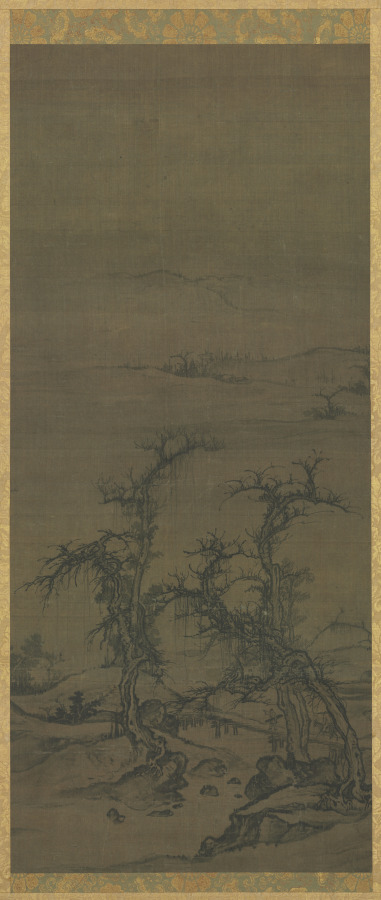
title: Carrying a Qin on a Visit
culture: China, Yuan dynasty (1271-1368)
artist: attributed to Luo Zhichuan (Chinese, active 1280s–1320s)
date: 1271–1368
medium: hanging scroll (now paneled), ink on silk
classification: Painting